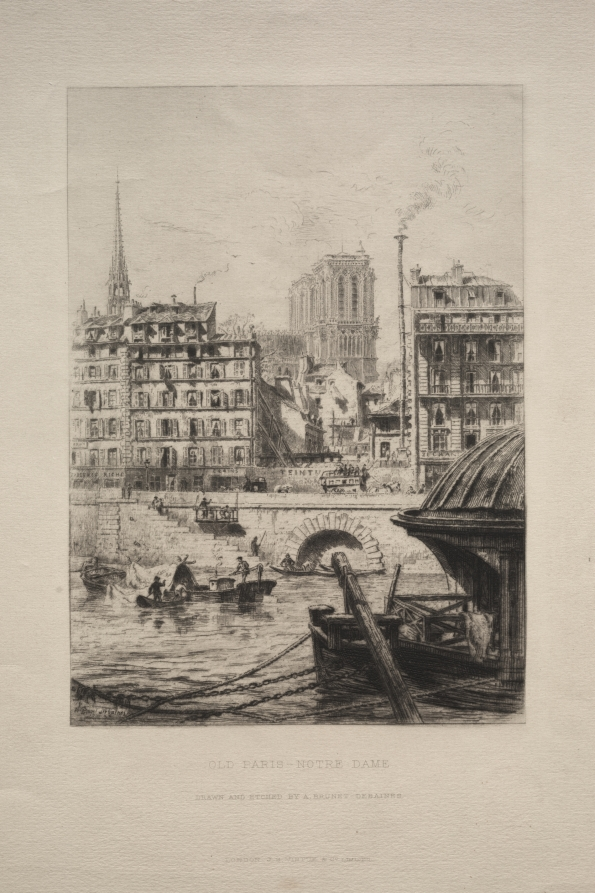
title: Old Paris: Notre Dame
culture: France, 19th century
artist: Alfred Brunet-Debaines (French, 1845–1939)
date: c. 1872–86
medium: etching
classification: Print